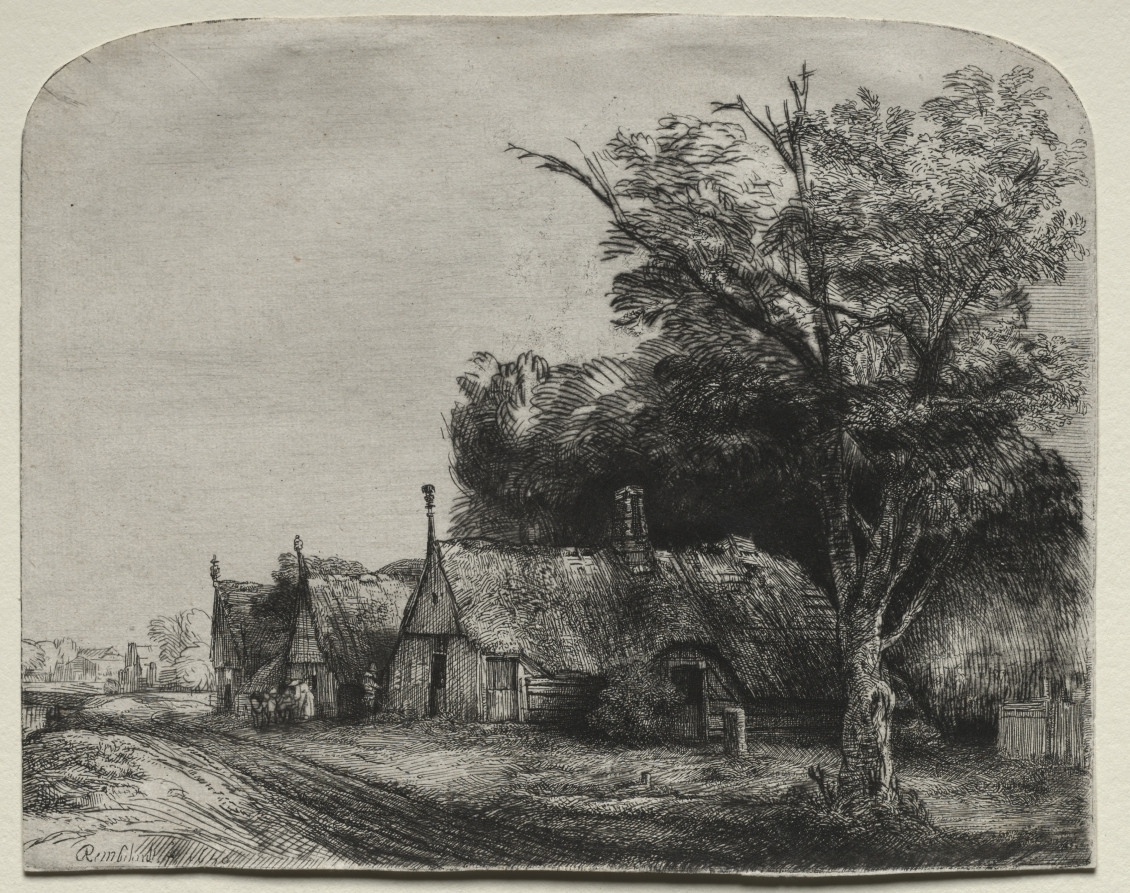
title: Landscape with Three Gabled Cottages beside a Road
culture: Netherlands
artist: Rembrandt van Rijn (Dutch, 1606–1669)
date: 1650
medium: etching and drypoint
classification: Print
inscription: lower right, in plate: Rembrandt f. 1650 ; VERSO, lower left, in graphite: 217. ; lower left, in graphite: nº 26 ; lower right, in graphite: 15